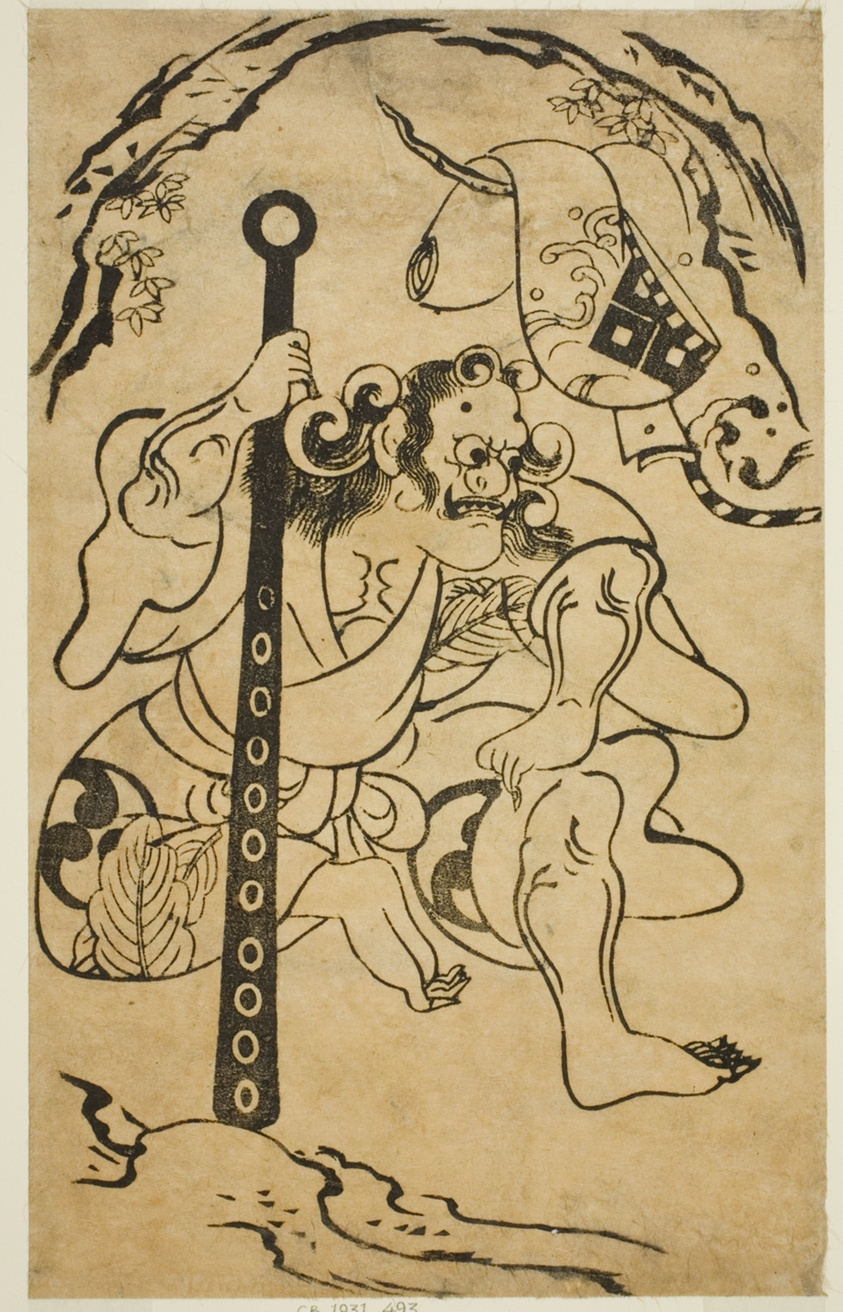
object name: Print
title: The actor Yamanaka Heikuro I as a demon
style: Japanese (culture or style)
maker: Attributed to Torii Kiyonobu I; Japanese, 1664-1729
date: c. 1706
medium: Woodblock print; hosoban, sumizuri-e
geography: Japan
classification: woodblock print; print; asian art; woodblock